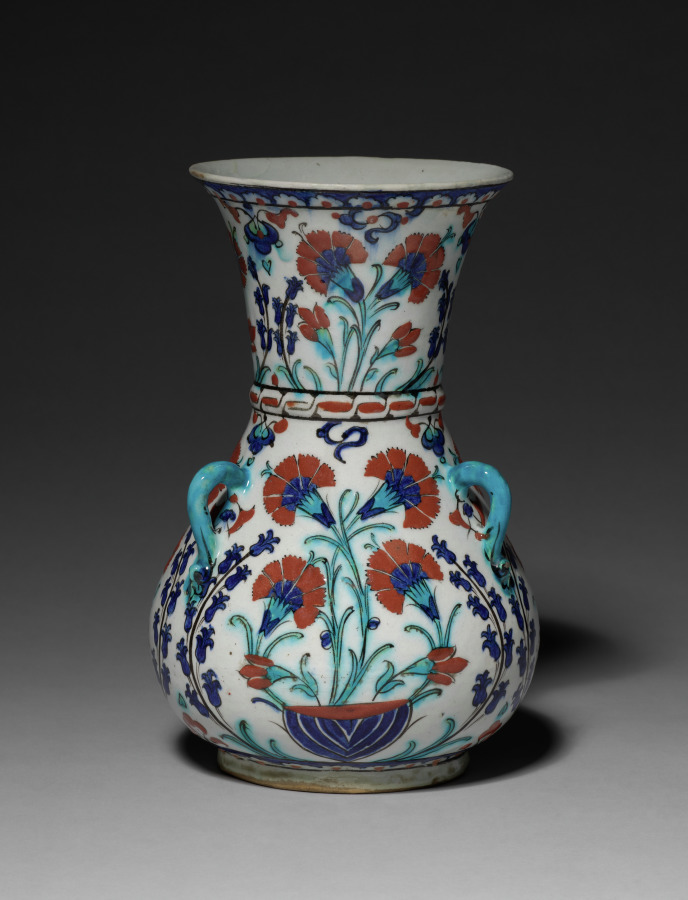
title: Mosque Lamp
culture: Turkey, Iznik, Ottoman period (1299–1922)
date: 1585–95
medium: Fritware with underglaze design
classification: Ceramic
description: Mosque lamps typically functioned as a lampshade, containing an oil lamp inside. Due to the opacity of this Ottoman lamp, it is likely that its primary function was not illumination. Instead, it would have been hung from chains in a mosque or mausoleum to add to the beauty of the space. This lamp is decorated with bright red carnations and blue hyacinths with additional floral and vegetal elements. The turquoise loops would have served for suspension from the ceiling. It is also possible that lamps like this were used as acoustic devices, softening the echo of prayer and discussion within the mosque’s halls.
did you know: Fritware is made of ground quartz, glass frit (partially fused glass), and a small proportion of fine white clay to approximate the light color and weight of Chinese porcelain.